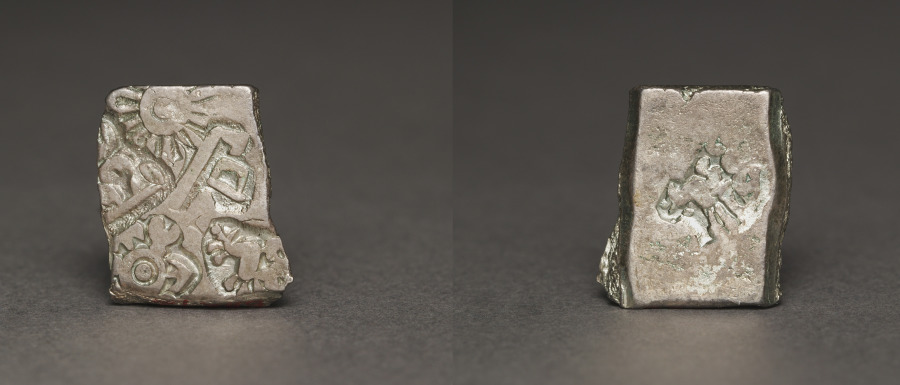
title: Punch-Marked Coin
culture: India, Rajasthan, Maurya period (322–185 BCE)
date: 400–300 BCE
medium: silver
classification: Coins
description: Indigenous Indian coinage was cut to weight from sheets of silver or copper and punch-marked, instead of die-cast. Each punch-marked coin had a unique combination of symbols.